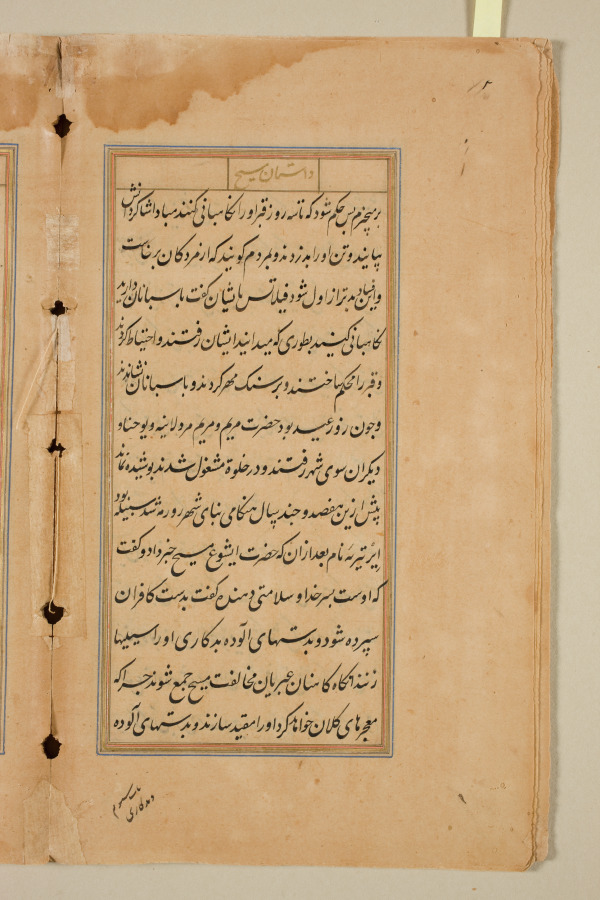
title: Text page from a Mirror of Holiness (Mir’at al-quds) of Father Jerome Xavier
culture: Mughal India, Allahabad, made for Prince Salim (1569–1627)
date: 1602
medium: Ink and gold on paper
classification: Manuscript